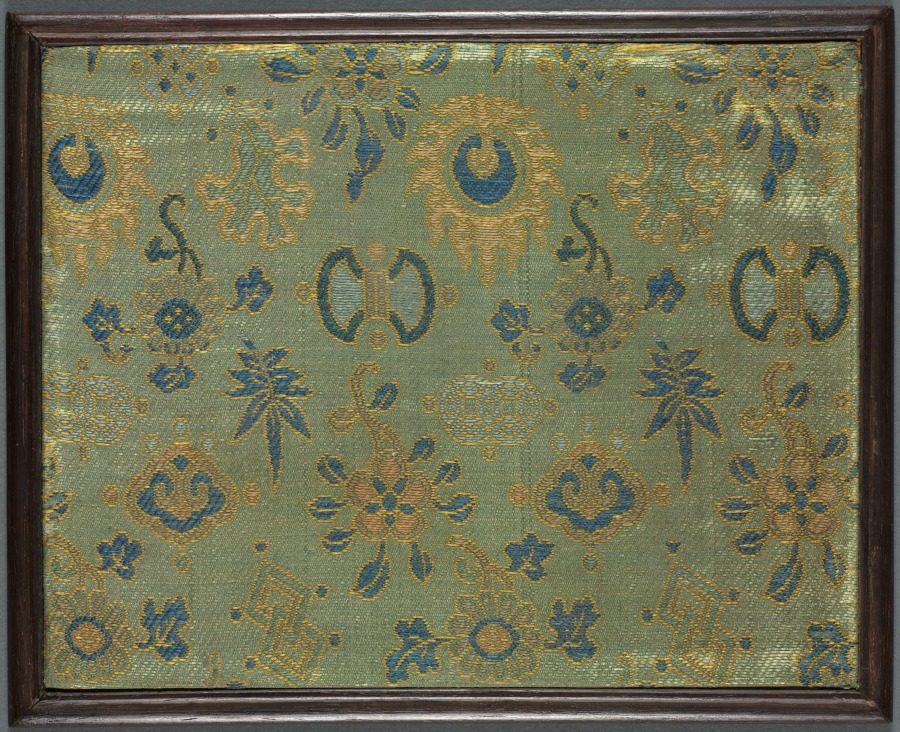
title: Album of Landscape Painting Illustrating Old Poems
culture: China, Qing dynasty (1644–1911)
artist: Hua Yan (Chinese, 1682–c. 1765)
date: 1745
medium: Album of twelve leaves; ink and light color on paper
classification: Painting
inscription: 新羅山人畫冊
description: Hua Yan is one of the Eight Eccentrics of Yangzhou, who rejected orthodox ideas about painting.